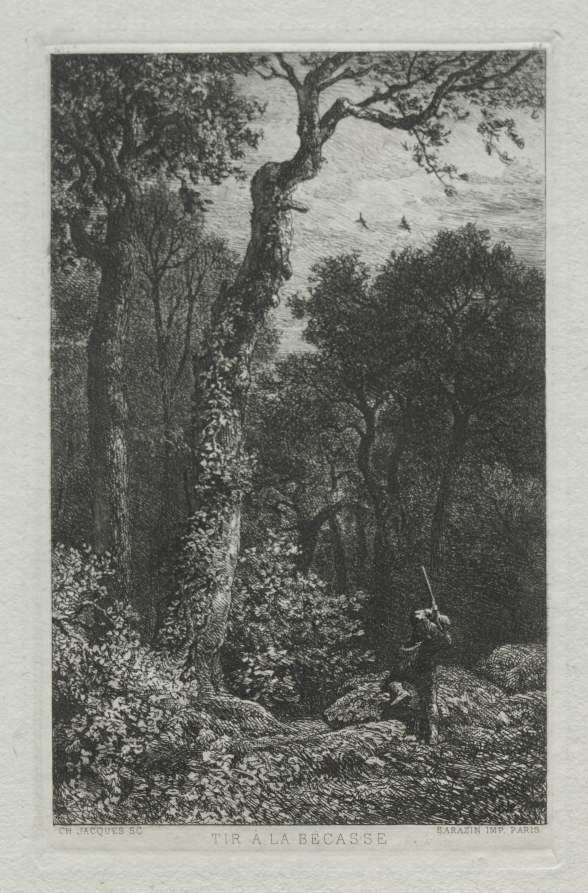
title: Shooting the Woodcock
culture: France, 19th century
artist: Charles-Émile Jacque (French, 1813–1894)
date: 1864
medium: etching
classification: Print